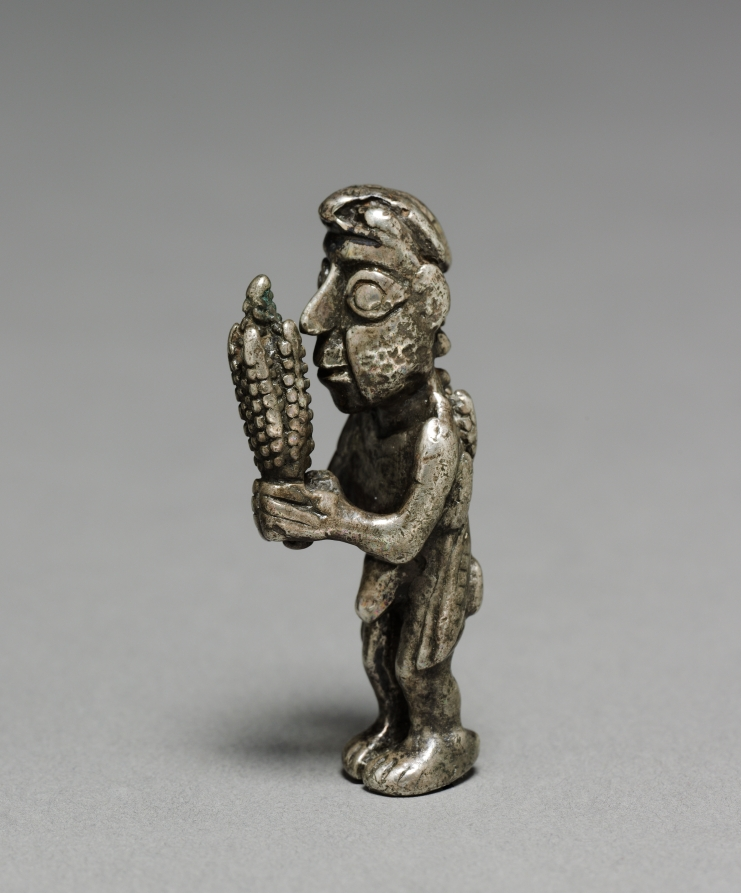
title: Agricultural Figurine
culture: Peru, Inka style (1400-1532)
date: 1400–1532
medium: cast silver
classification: Sculpture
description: Precious metal was a major Inka artistic medium, but most was melted down after the conquest to fund the Spanish court. The sole remains are small-scale objects from tombs and offerings. The body of the figurine is covered with fruits and vegetables and may have been made after the Spanish conquest.